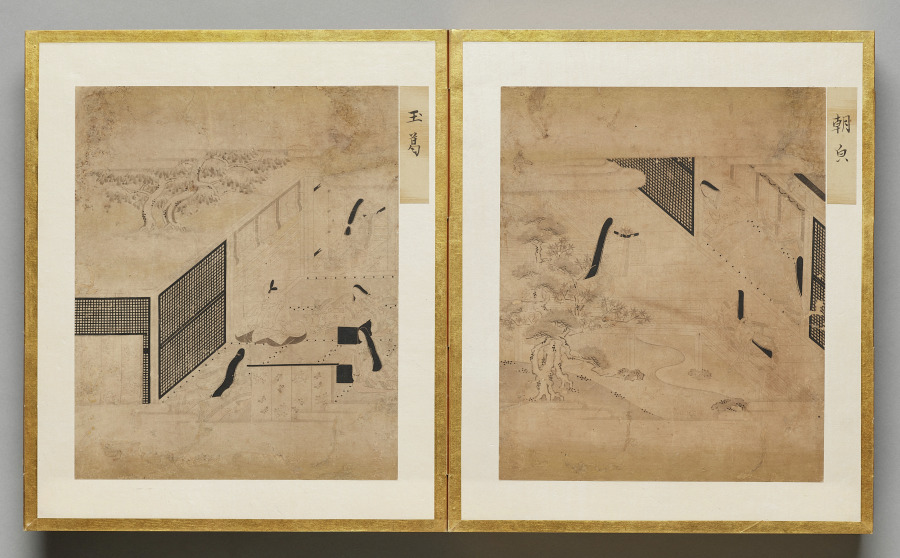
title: Morning Glory from Album of Illustrations for the Tale of Genji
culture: Japan, Edo period (1615–1868)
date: 1600s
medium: painting in an accordion-style album; ink, light color, and gold on paper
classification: Bound Volume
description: This album contains illustrations for the classic literary work the Tale of Genji, authored in the 1000s by Murasaki Shikibu, an aristocrat of the Heian period (794–1185) court. The scenes are painted in the “white drawing” (hakubyō) mode, in which a fine ink line is used to depict figures and spaces with great subtlety, punctuated only occasionally by traces of red pigment for a character’s lips, a detail of a garment, or a decorative element. These two scenes illustrate episodes from the chapters “Thin Veil of Cloud” (Usugumo) and “Barrier Gate” (Sekiya).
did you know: The illustrations are identified by chapter title in cartouches to the upper right of the paintings.